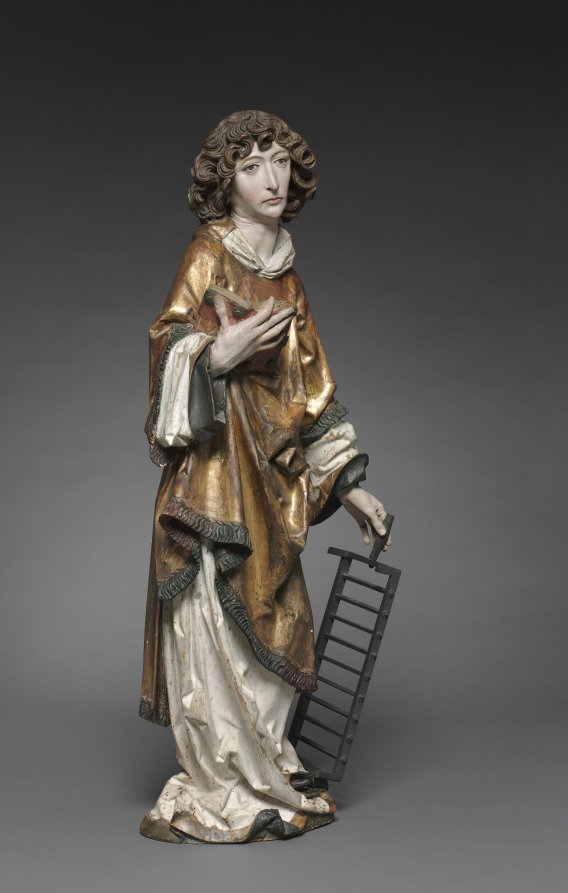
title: Saint Lawrence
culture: Germany, Würzburg, 16th century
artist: Tilman Riemenschneider (German, active Würzburg, c. 1460–1531)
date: 1502–8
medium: lindenwood with polychromy and gilding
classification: Sculpture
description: This sculpture, along with that of Saint Stephen (1959.43), and two female saints preserved in Frankfurt (Historisches Museum), are believed to be the remaining fragments of a large altarpiece carved by Riemenschneider for the Dominican convent in Rothenburg in Franconia (demolished in 1813). Saints Stephen and Lawrence both wear the dalmatic to indicate their status as deacons in the early church. Each holds a symbol of his martyrdom; here, Saint Lawrence holds a grill to indicate his death by burning. Late Gothic Style Art in Germany through the early 1500s remained firmly anchored in the late Gothic style with its associated interests in realism. Riemenschneider was one of the most prolific and versatile sculptors of this style, a recognized master in both stone and wood. His flourishing workshop employed as many as 40 apprentices in sculpting, woodcarving, and painting. His sculptures are noted for the dreamy, melancholy, and introspective quality in their expressions, as well as their remarkable attention to detail.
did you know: Before Riemenschneider finally settled in Würzburg, Germany, in 1484, he traveled to Strasbourg and Colmar, where he became acquainted with the works of the engraver Martin Schongauer.